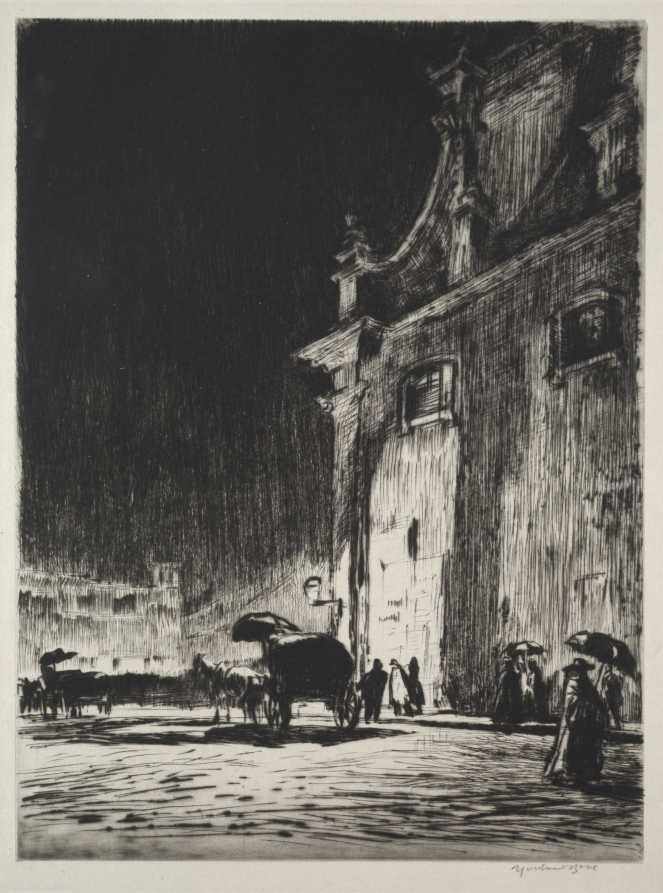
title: Rainy Night in Rome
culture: England, 20th century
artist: Muirhead Bone (British, 1876–1953)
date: 1913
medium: drypoint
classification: Print